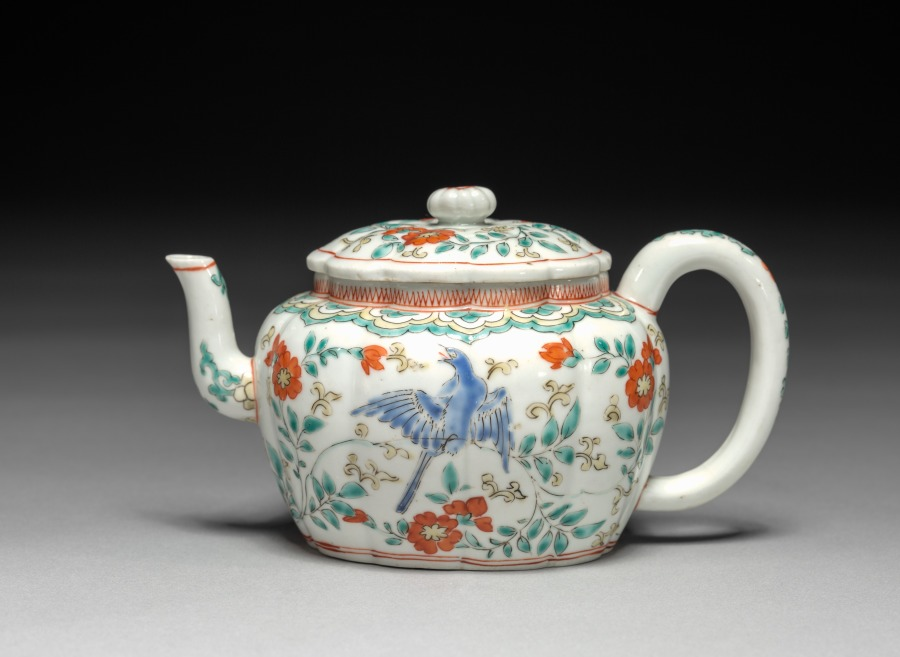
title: Teapot with Birds and Flowers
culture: Japan, Edo period (1615–1868)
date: 1700s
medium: Porcelain with overglaze color enamel (Arita ware)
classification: Ceramic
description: This small vessel was likely made as a teapot for the European export market. The different colored overglaze enamels, orange, blue, green, and yellow, combine with a wiry black outline to form the design of a singing bird on a flowering bough repeated on each side of the pot.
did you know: The wood storage box for this pot refers to it as a suichū, which means water ewer.